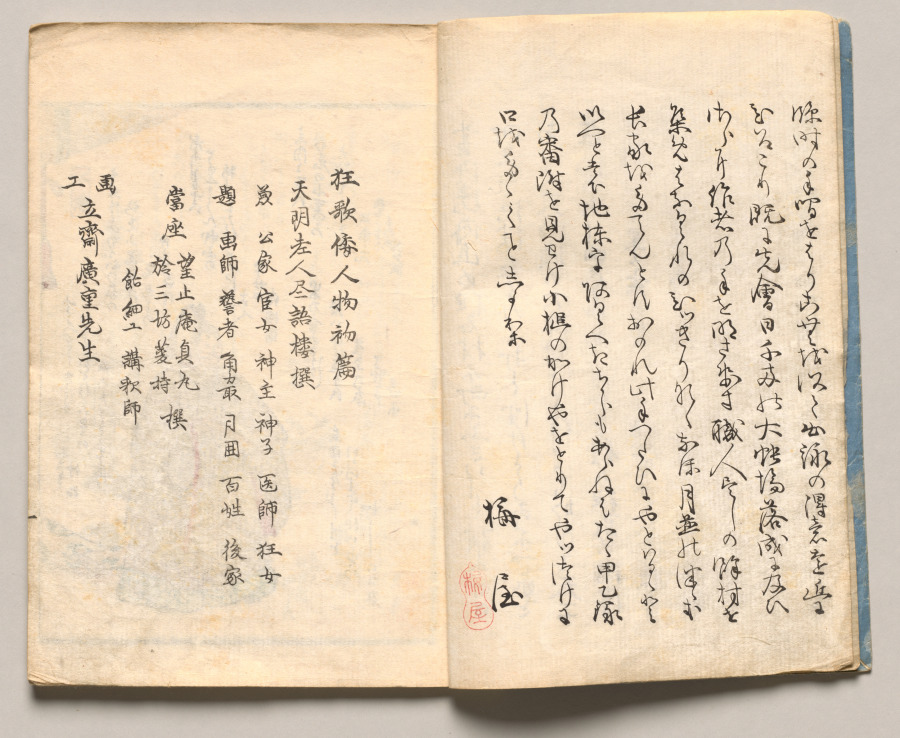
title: Spread Two from Volume One of People of Japan in Light Verse (Kyōka)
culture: Japan, Edo period (1615–1868)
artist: Utagawa Hiroshige (Japanese, 1797–1858)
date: 1857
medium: Woodblock-printed book; ink and color on paper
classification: Bound Volume